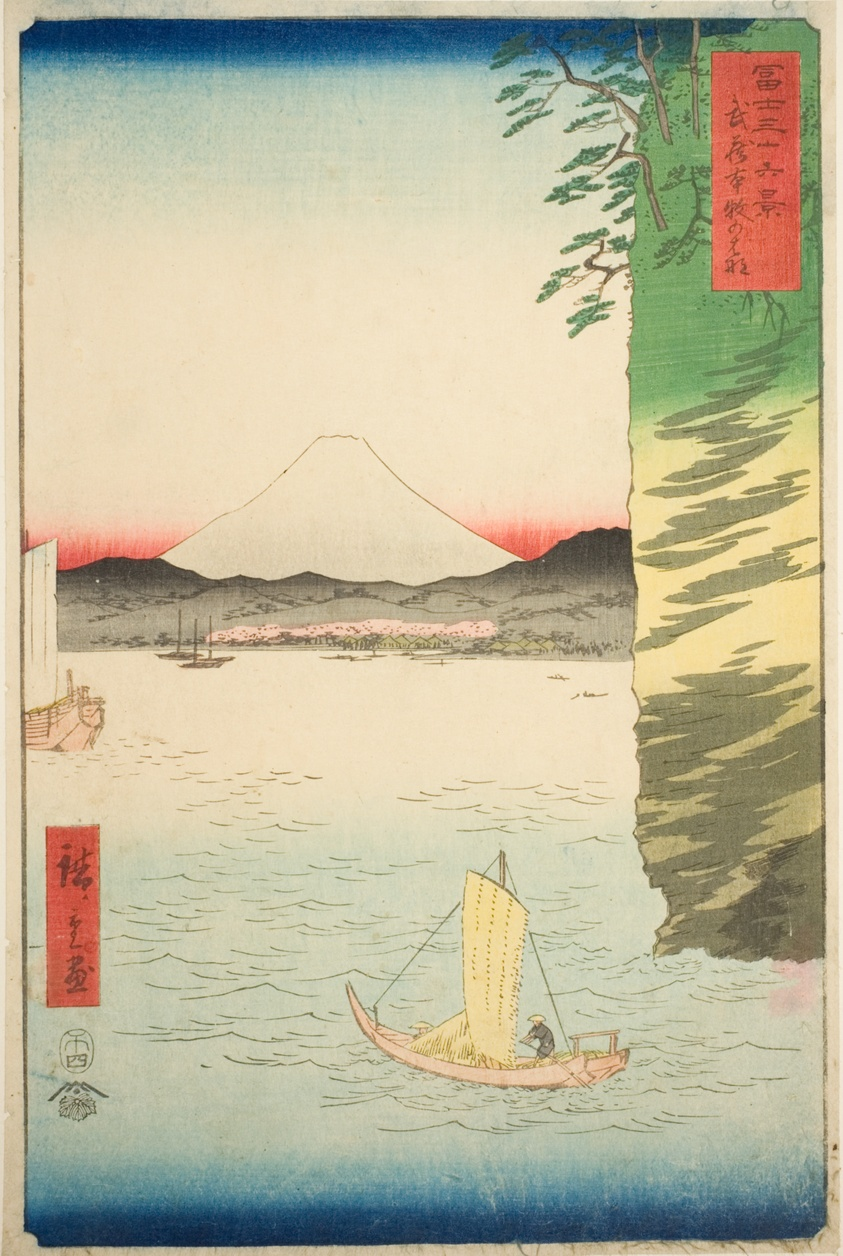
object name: Print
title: Honmoku in Musashi Province (Musashi Honmoku no hana), from the series "Thirty-six Views of Mount Fuji (Fuji sanjurokkei)"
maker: Utagawa Hiroshige 歌川 広重; Japanese, 1797-1858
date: 1858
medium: Color woodblock print; oban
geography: Japan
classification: woodblock print; print; asian art